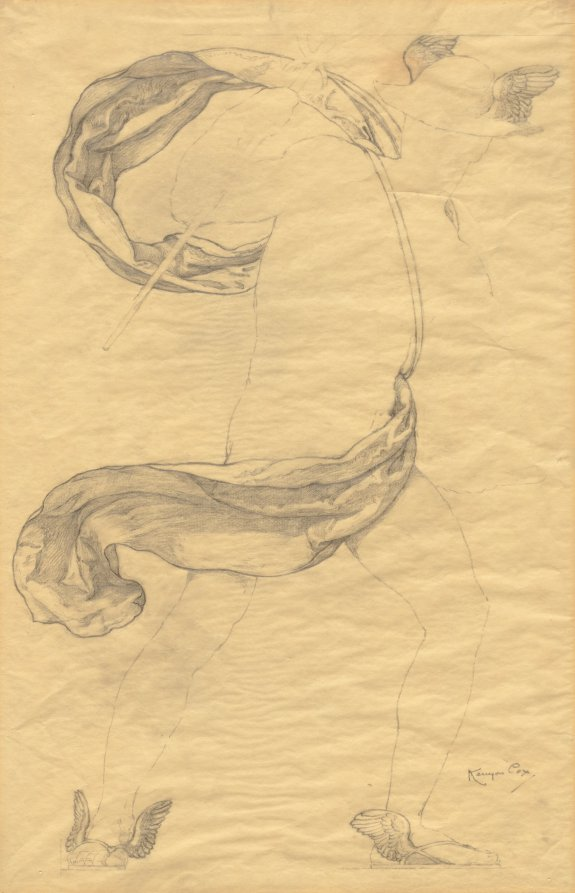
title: Sketch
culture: America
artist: Kenyon Cox (American, 1856–1919)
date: 1912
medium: graphite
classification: Drawing